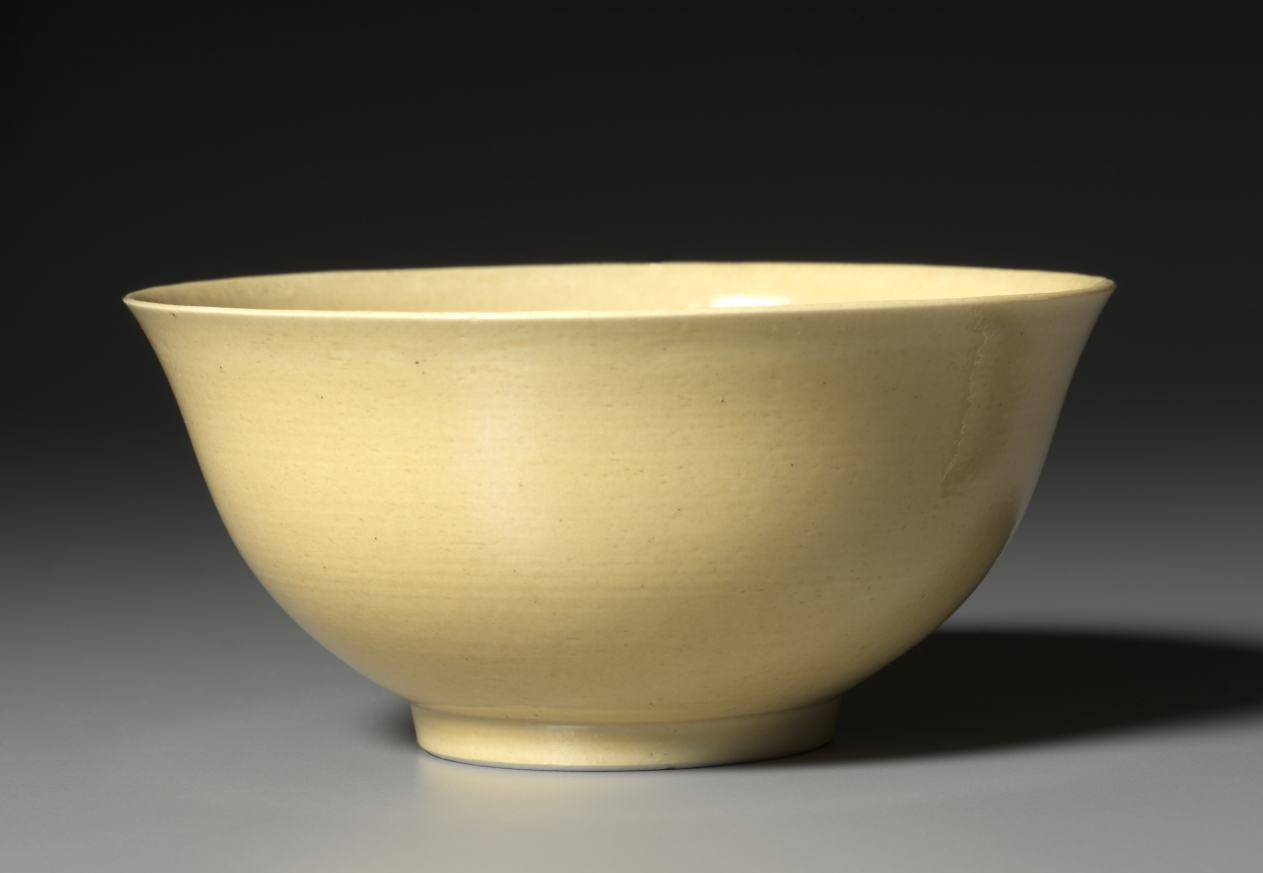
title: Bowl with Yellow Glaze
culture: China, Qing dynasty (1644-1911), Daoguang mark and reign (1821-50)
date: 1821–50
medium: glazed porcelain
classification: Ceramic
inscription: 大清道光年制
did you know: This monochromatic yellow dish was made for the imperial household.